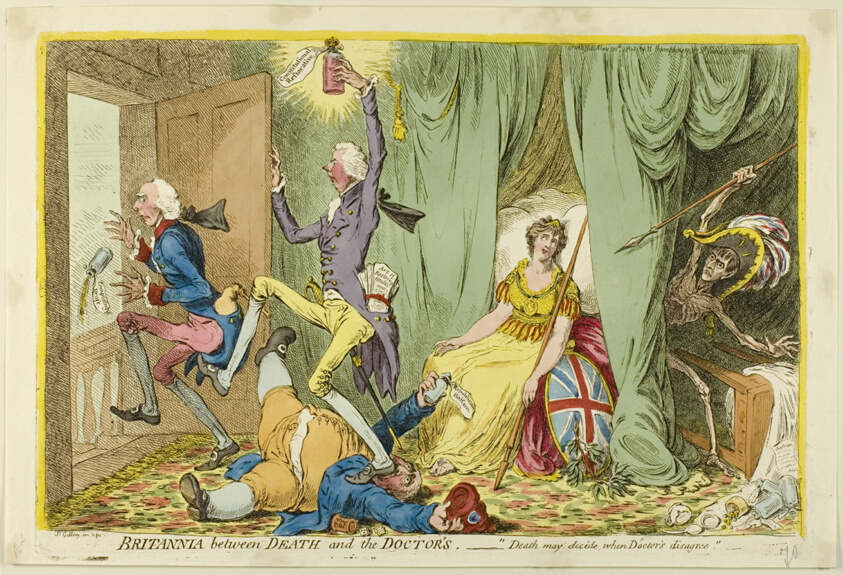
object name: Print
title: Britannia Between Death and the Doctors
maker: James Gillray (English, 1756-1815); published by Hannah Humphrey (English, c. 1745-1818)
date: published May 20, 1804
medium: Hand-colored etching on paper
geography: England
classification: etching; print; prints and drawing